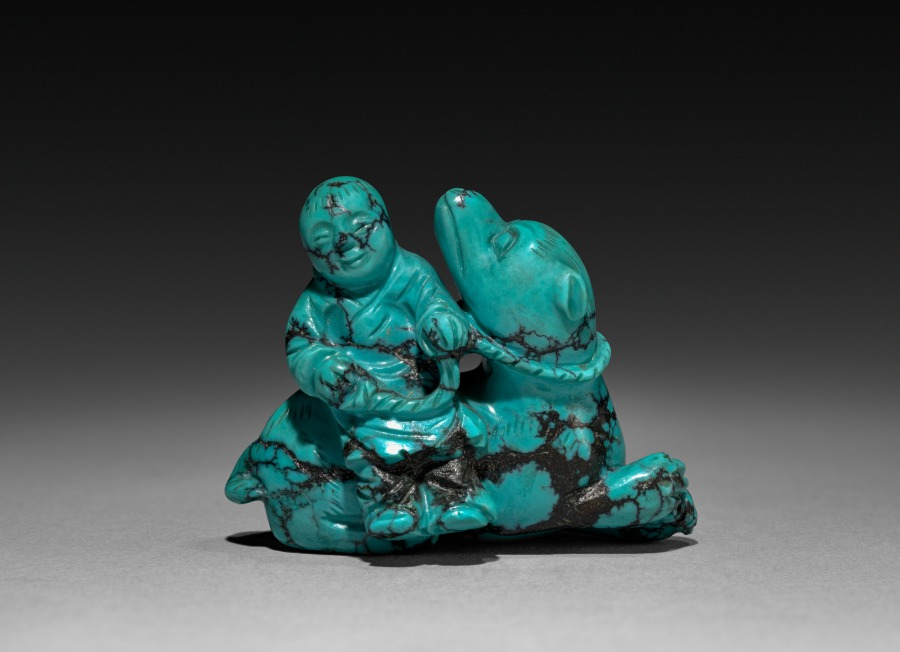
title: Boy and Dog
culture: China, Ming dynasty (1368–1644)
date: 1400s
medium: Turquoise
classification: Stone